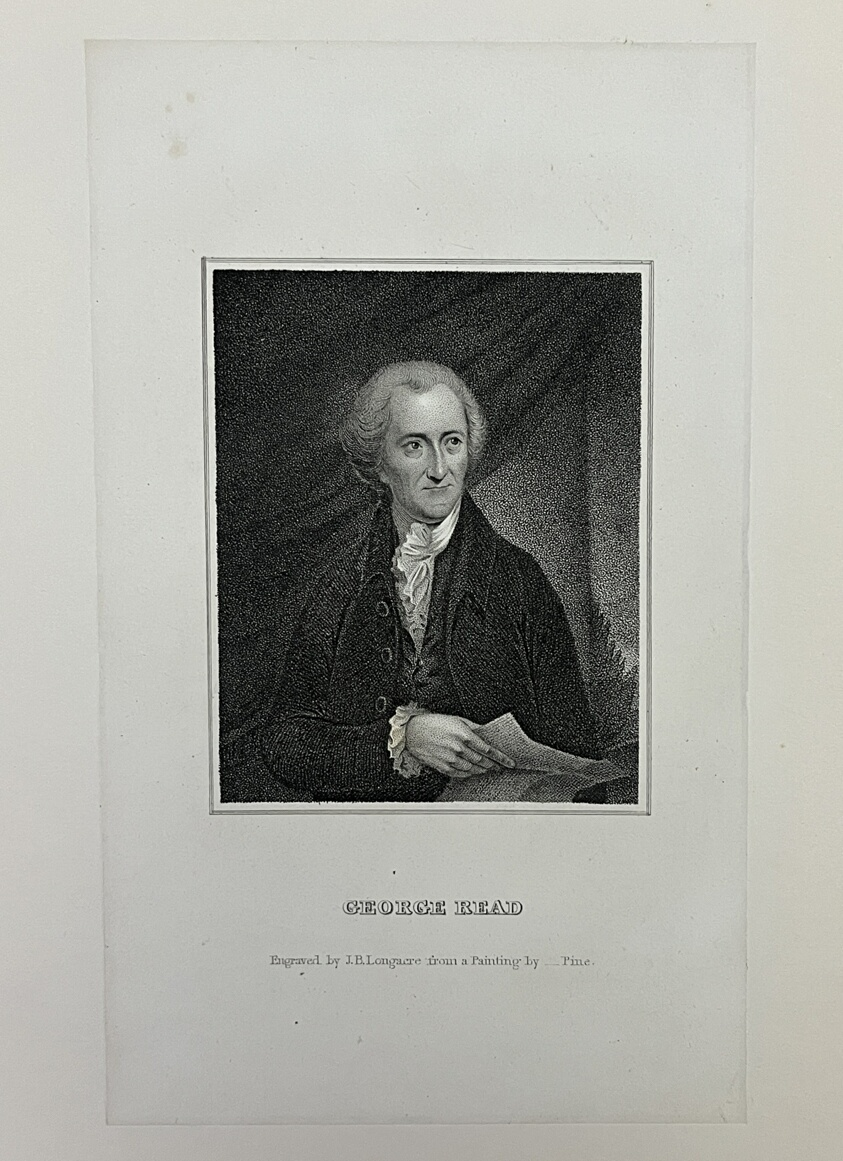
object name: Print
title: George Read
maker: James Barton Longacre (American, 1794-1869); after Robert Edge Pine (British, 1742-1788)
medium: Stipple engraving on paper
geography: United States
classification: reproduction; print; prints and drawing